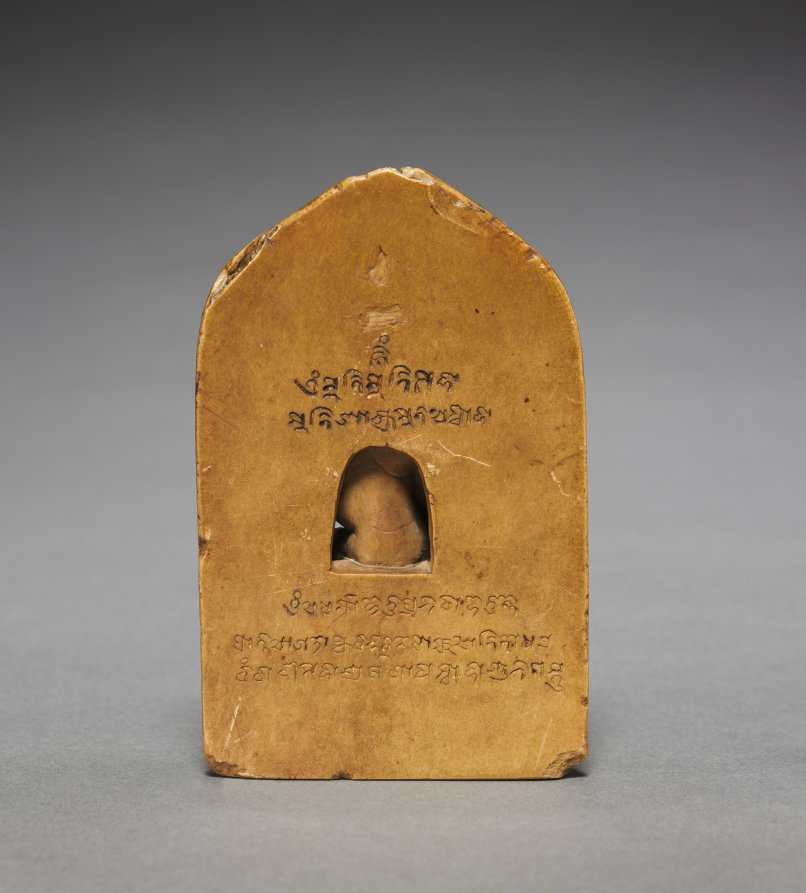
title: Shakyamuni Buddha Calling the Earth to Witness his Enlightenment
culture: Northeast India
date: 1000–1100s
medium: Kaolin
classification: Sculpture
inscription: At the top: Om muni muni mahamuni Shakyamunya svaha. Below: Ye dharma hetu prabhava hetu tesam tathagata hya vadat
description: Carved in a soft stone that approximates ivory, the central image of the historical Buddha at the moment of his enlightenment is surrounded by scenes from his own life, including his death at the top. The scenes are arranged not strictly chronologically, but aesthetically, such that the scenes where he is standing or seated are paired. A prayer written in a 12th-century Newari script indicates that this Indian sculpture was taken to Nepal. Buddhist travelers brought easily transportable personal devotional sculptures out of India to the Himalayas, where they served as models for local artists. Such works were valued abroad for their proximity to the source of Buddhism, founded in India during the 400s BC.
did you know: Kaolinite is a mineral that is actually a type of clay.